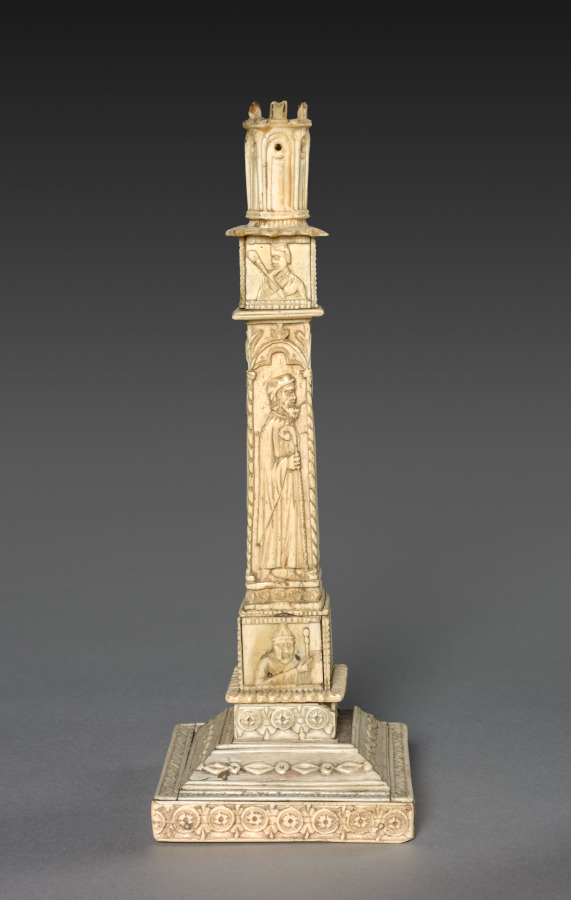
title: Candlestick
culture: Italy, 15th century style (possibly 19th-early 20th century)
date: 1800s - early 1900s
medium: ivory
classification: Ivory